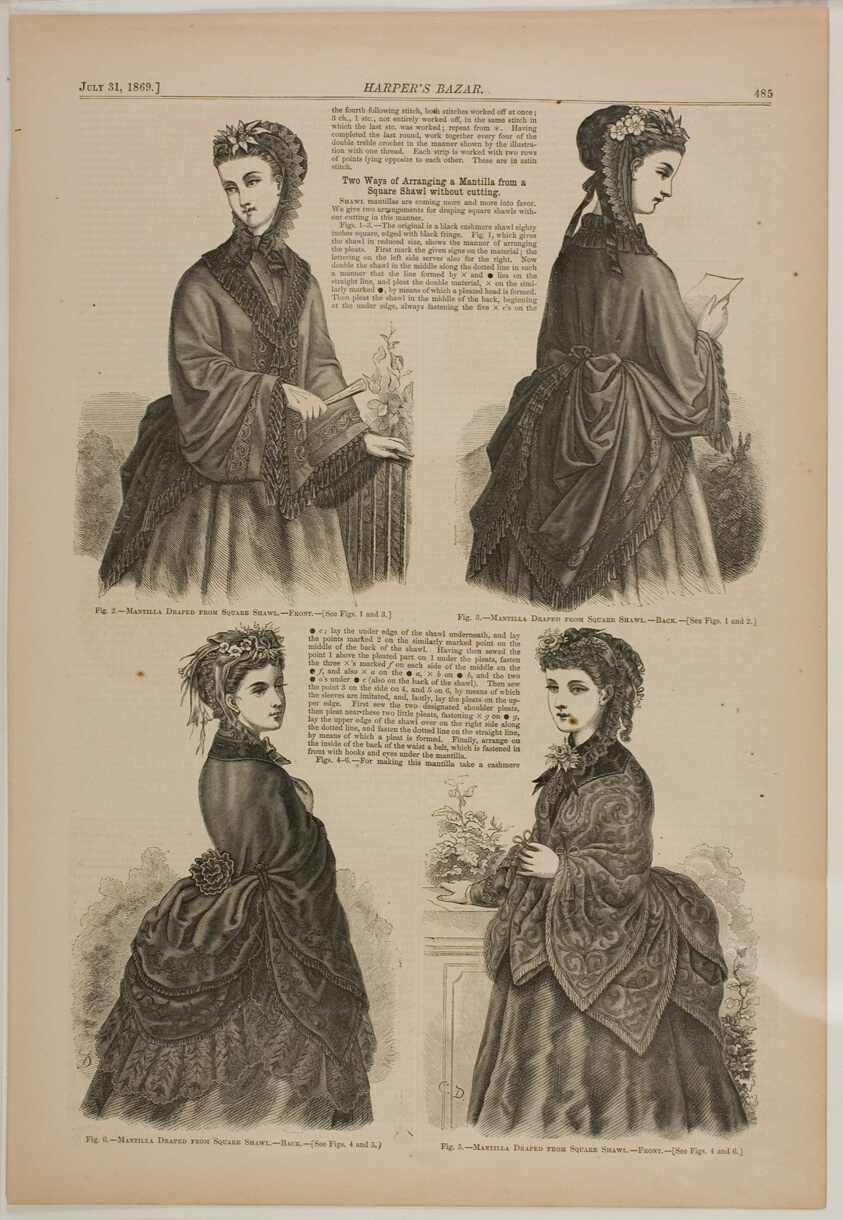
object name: Print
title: What Shall We Do Next?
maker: Winslow Homer (American, 1836-1910); published by Harper's Bazar (American, founded 1867)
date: published July 31, 1869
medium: Wood engraving on paper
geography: United States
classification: wood engraving; print; prints and drawing